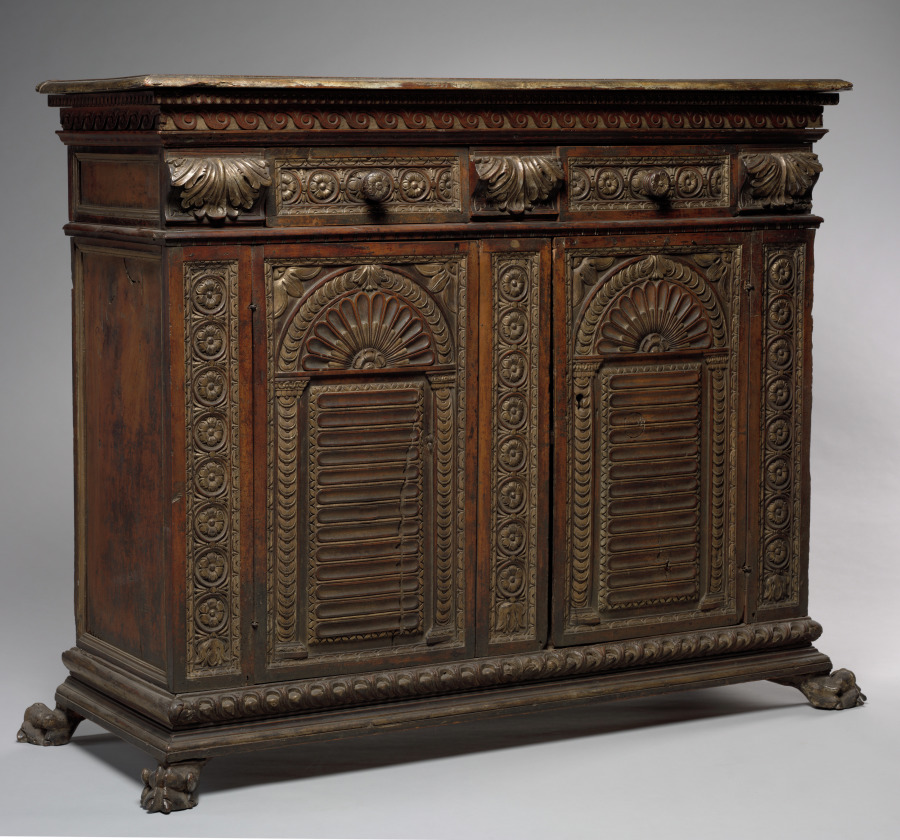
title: Credenza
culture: Italy, Brescia, 16th century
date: mid 1500s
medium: walnut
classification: Furniture and woodwork